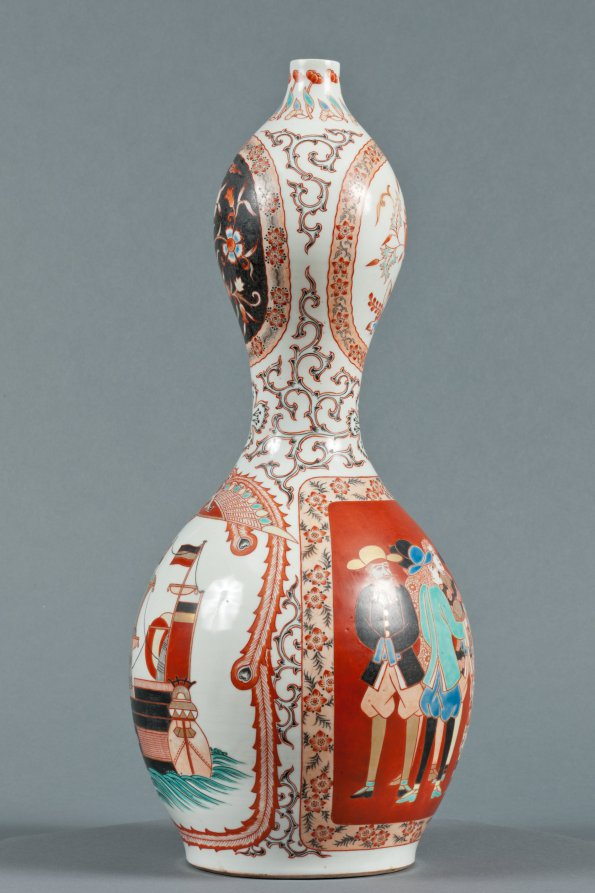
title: Bottle with Western Ships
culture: Japan, Edo period (1615–1868)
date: c. 1800–1868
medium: Porcelain with decoration in colored enamels and underglaze blue, overglaze enamels, and gold (Hizen ware, Arita type)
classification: Ceramic